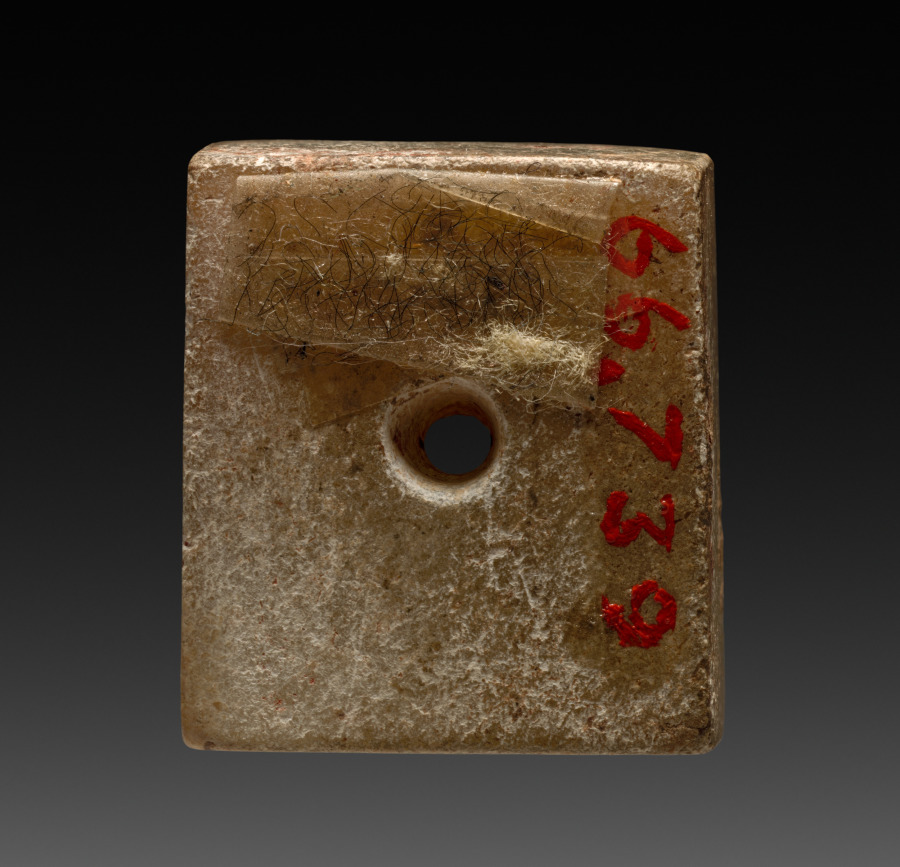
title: Prismatic Bead with Ogre Mask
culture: China, Western Zhou dynasty (c. 1046–771 BCE)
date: 1100–900 BCE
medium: Jade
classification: Jade